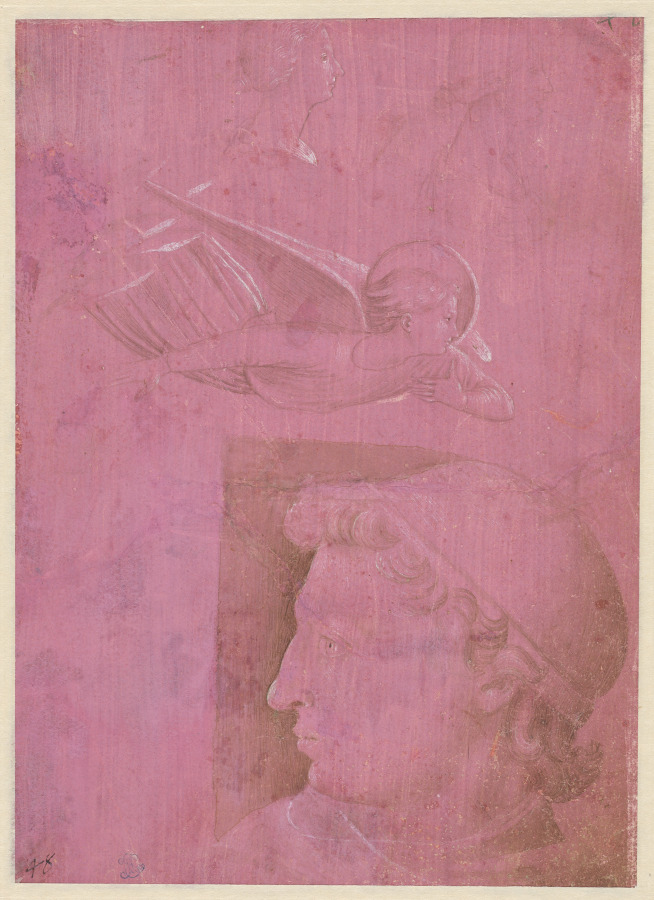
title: Head of a Man, Two Studies of a Woman's Profile, and a Study of An Angel (verso)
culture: Italy, 15th century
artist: Benozzo Gozzoli (Italian, 1420–1497)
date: c. 1458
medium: metalpoint with point of brush and brown wash, brush and brown wash, and stylus, heightened with white gouache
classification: Drawing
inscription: upper right, in brown ink: [42?] [partially masked] ; lower left, in brown ink: 48